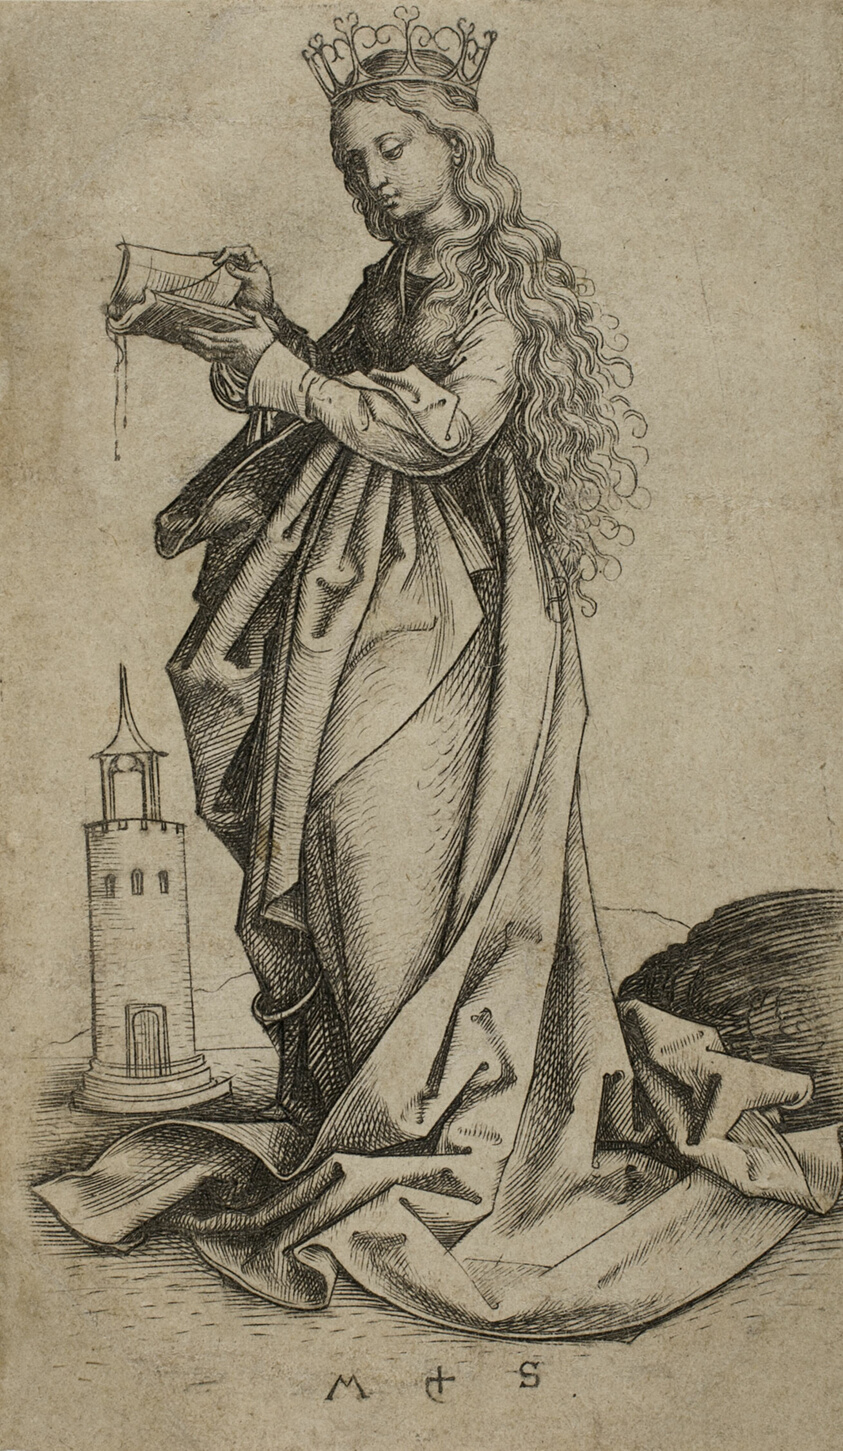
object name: Print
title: St. Barbara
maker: Martin Schongauer (German, c. 1430/50-1491)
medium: Engraving on paper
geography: Germany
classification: engraving; print; prints and drawing